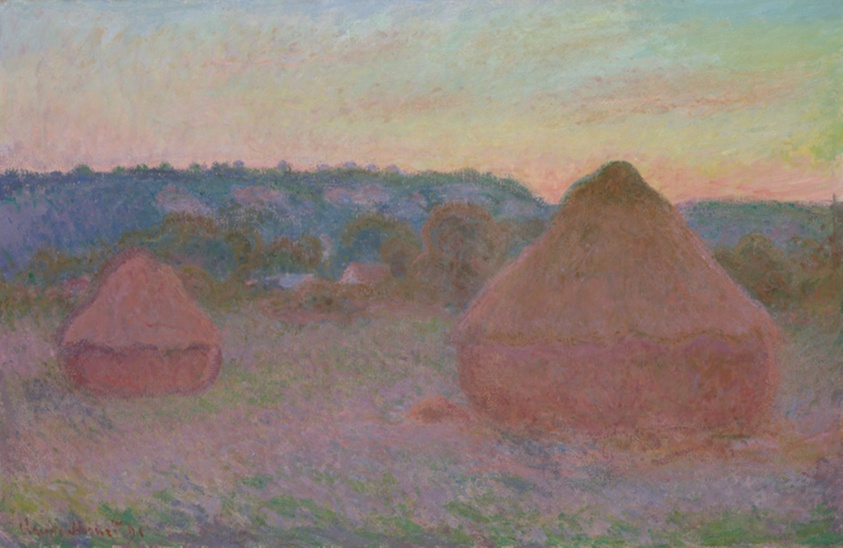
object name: Painting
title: Stacks of Wheat (End of Day, Autumn)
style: Impressionism, nineteenth century, 19th century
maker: Claude Monet (French, 1840–1926)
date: 1890–91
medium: Oil on canvas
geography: France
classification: oil on canvas; french; paint; oil paintings (visual works); painting; european painting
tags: seasons, wheat, rural life, pink (color), hills, France, blue, weather/seasons, landscapes